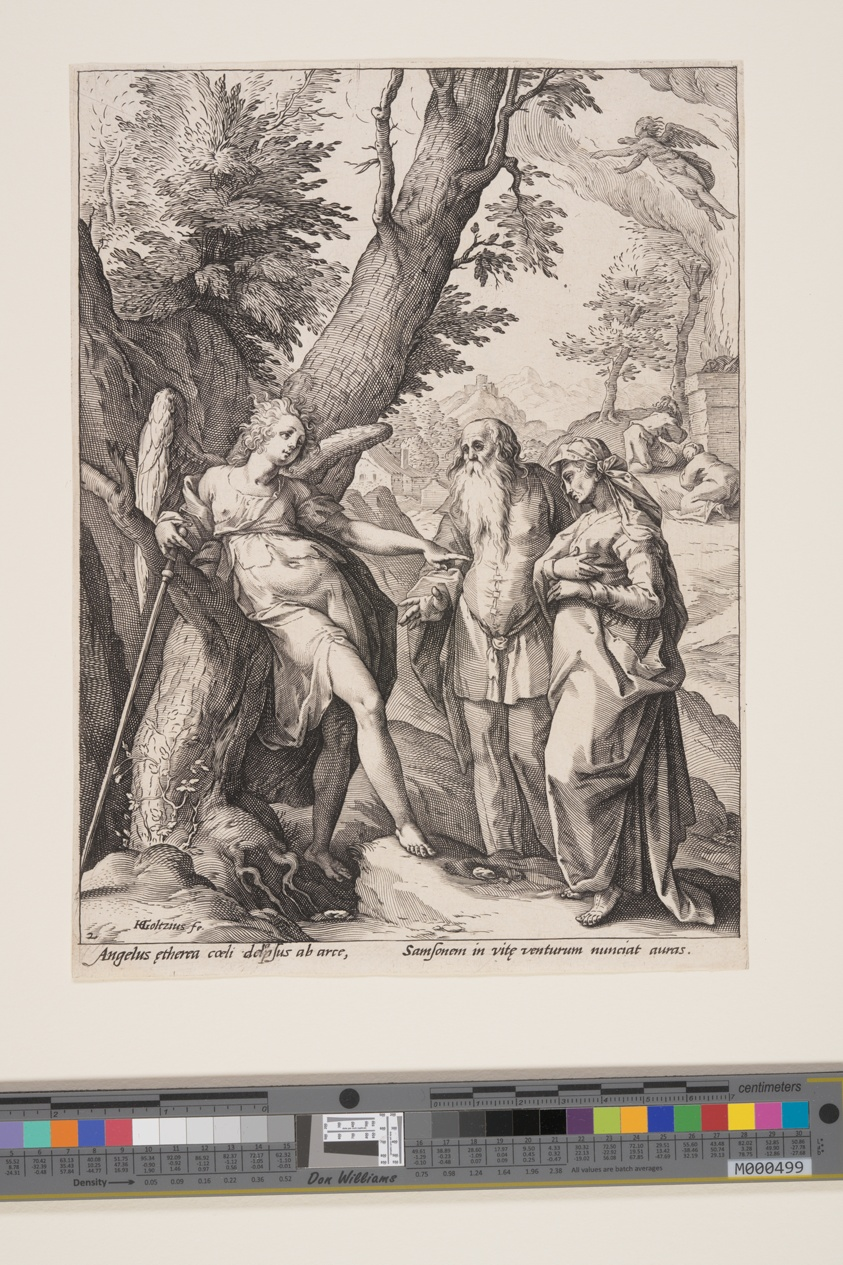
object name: Print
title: Angel with Manoah and His Wife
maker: Hendrick Goltzius (Dutch, 1558–1617)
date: 1586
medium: Engraving on laid paper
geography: Netherlands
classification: engraving; paper; print; prints and drawing